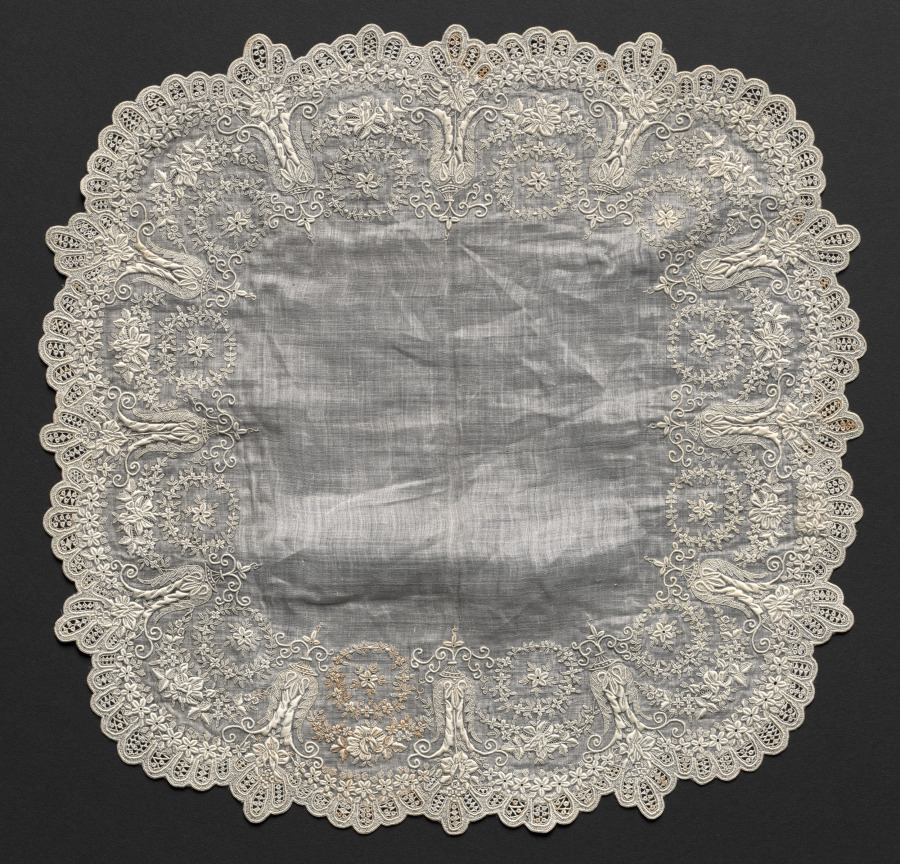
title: Embroidered Handkerchief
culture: France or Switzerland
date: 1800s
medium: Plain weave linen, embroidered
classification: Embroidery